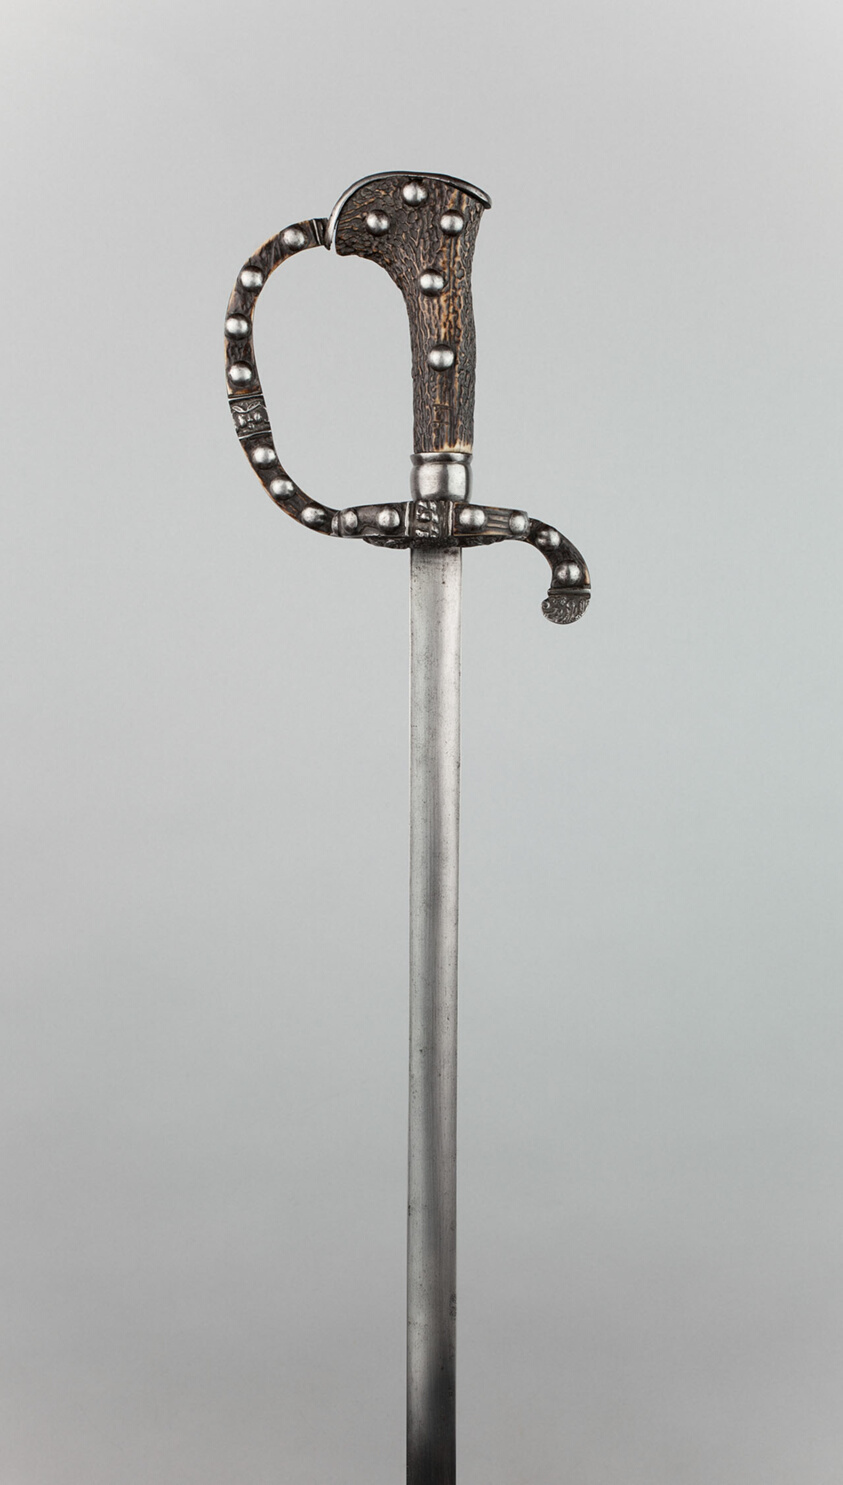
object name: Arms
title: Boar Sword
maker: German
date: 1650/60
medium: Steel, staghorn, and iron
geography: Germany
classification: edged weapon-sword; arms; arms and armor